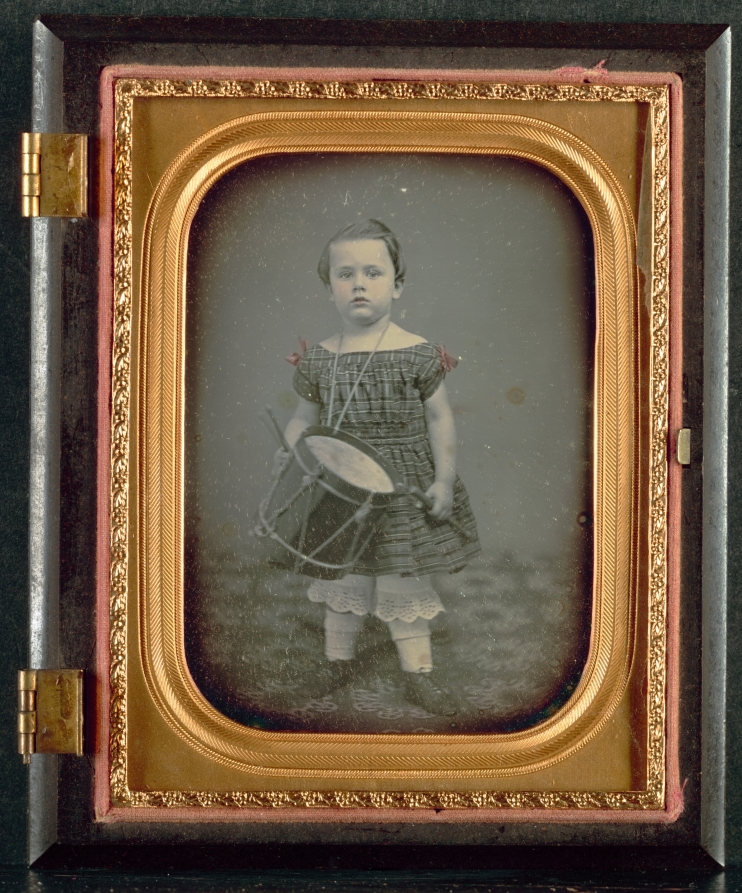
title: Child with Drum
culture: America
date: 1850s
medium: daguerreotype, quarter-plate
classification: Photograph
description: For this finely toned daguerreotype, an unknown photographer skillfully manipulated a bulky camera into a low vantagepoint, ensured even lighting, and positioned the quaintly dressed subject against a neutral background to create a charming portrait. The child was carefully coached to stare directly into the lens and to hold the toy drum and drumsticks convincingly. Perhaps the drum is meant to recall earlier times in American history and to symbolize its fight for independence.